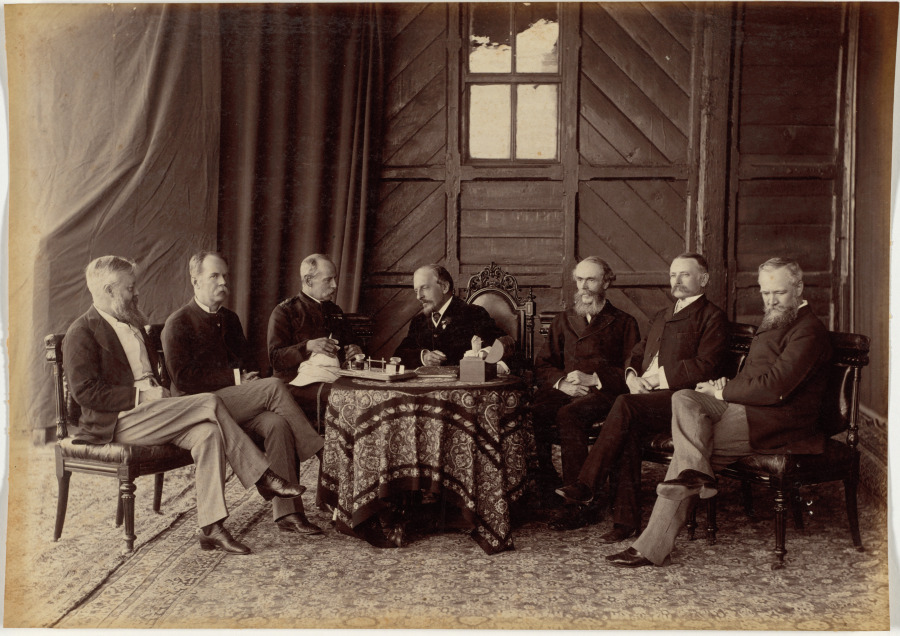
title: Lord Dufferin and the Supreme Council of Government of India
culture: India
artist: Raja Deen Dayal (Indian, 1844–1905)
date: 1887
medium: albumen print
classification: Photograph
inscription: No visible inscriptions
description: Each summer, the British government left the heat of Calcutta for Shimla in the foothills of the Himalayas, where this photograph was taken. In 1885, Deen Dayal began spending his summers there to be near the officials, who were both subjects and clients. The viceroy, or British ruler, of India, Frederick Temple-Blackwood, 1st Marquess of Dufferin and Ava (1826–1902), sits at the center of this staged meeting of the Supreme Council. Deen Dayal made images of Lord Dufferin and his wife, herself an amateur photographer, that led to his appointment as photographer to the viceroy, which resulted in access to other members of the British elite.